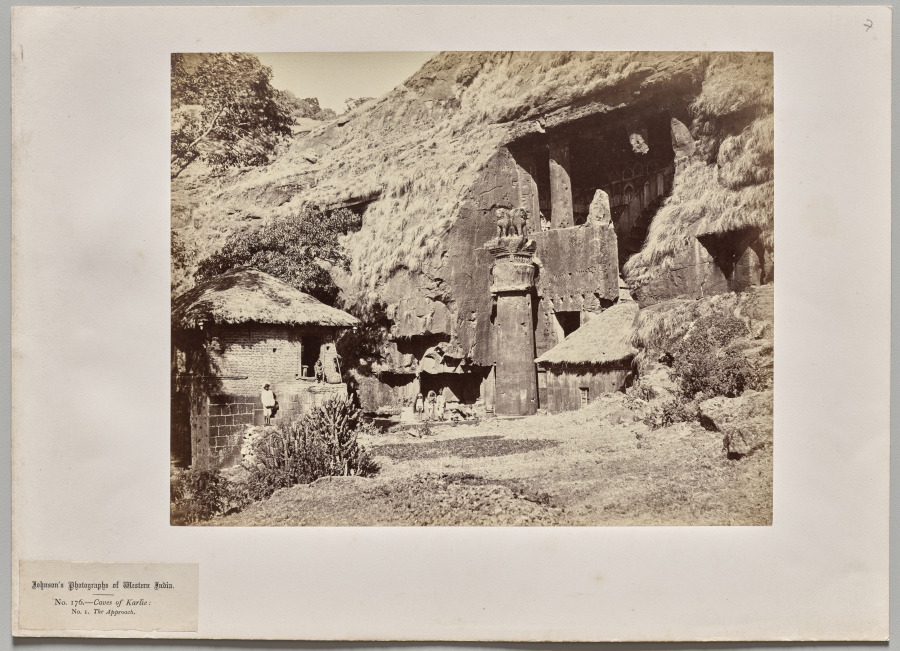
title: Caves of Karlie: No. 1, The Approach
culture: India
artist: William Johnson (British, active India, 1852–1868)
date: 1855–62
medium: albumen print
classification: Photograph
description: This early view of the entrance to the ancient Karlie, or Karla, Caves in Western India shows the site before its restoration, including the monumental entrance pillar topped by a sculpture. Windows cut into the rock provided light inside. The shrines, created between the 2nd century BCE and the 5th century CE, provided sanctuary and shelter for monks but also for travelers and traders.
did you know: The largest prayer hall in this complex of Buddhist shrines cut into the rock is a sanctuary 124 feet long with a ribbed vault 45 feet high.